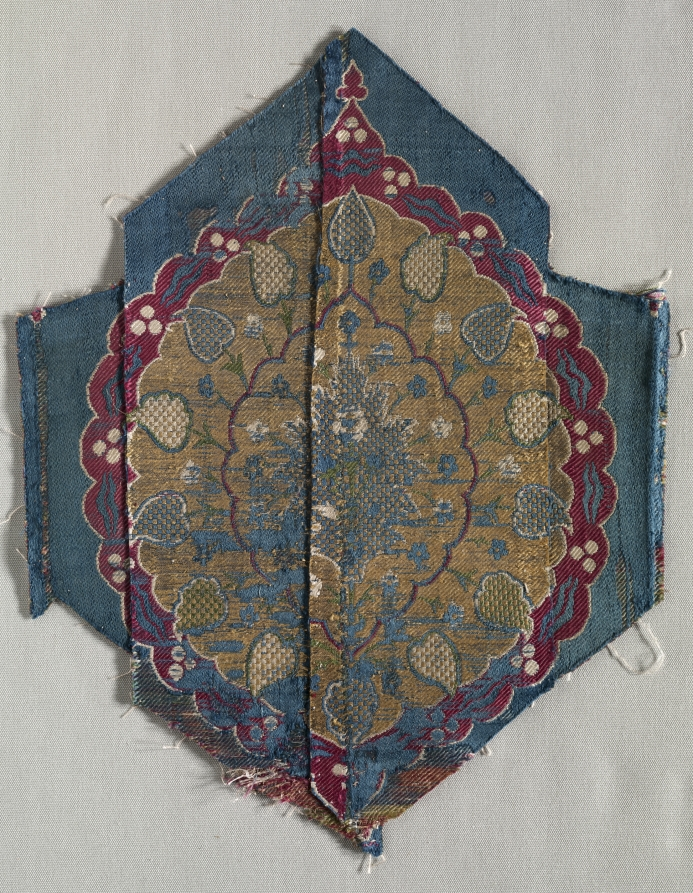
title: Textile Fragment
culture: Turkey, Bursa, 16th century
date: 16th century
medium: brocaded silk with metal thread weft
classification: Textile